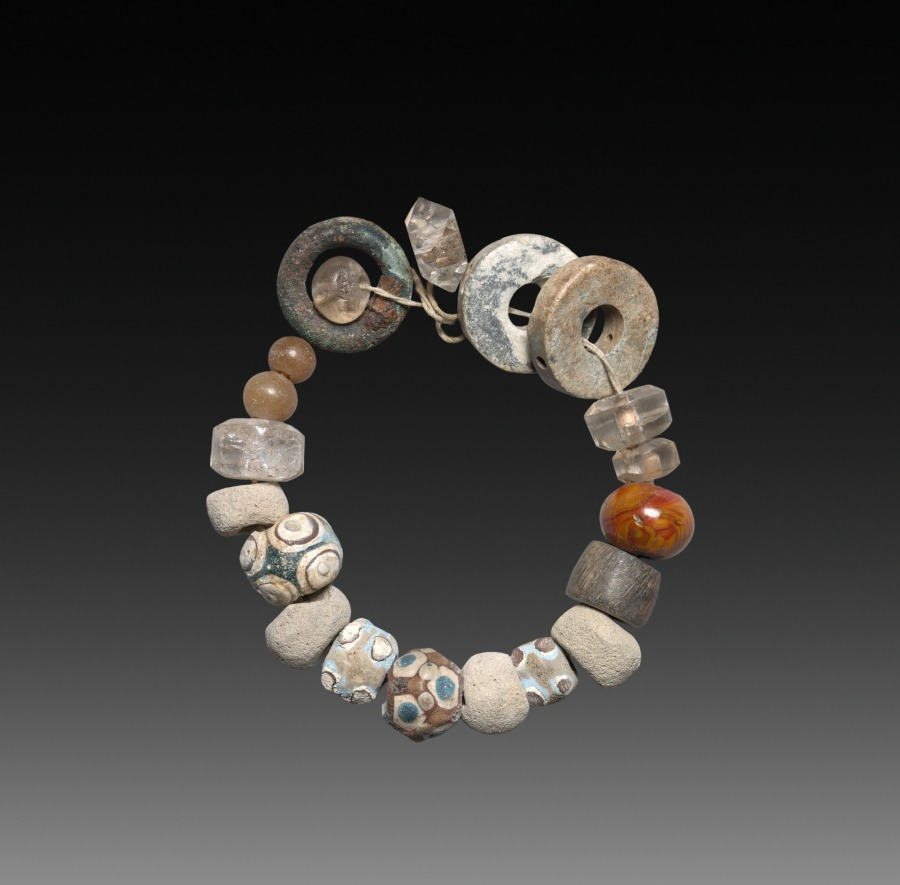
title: String of Beads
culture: China, Han dynasty (202 BCE–220 CE) or later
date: 200 CE or later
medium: crystal, stone, pottery and clay beads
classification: Jewelry